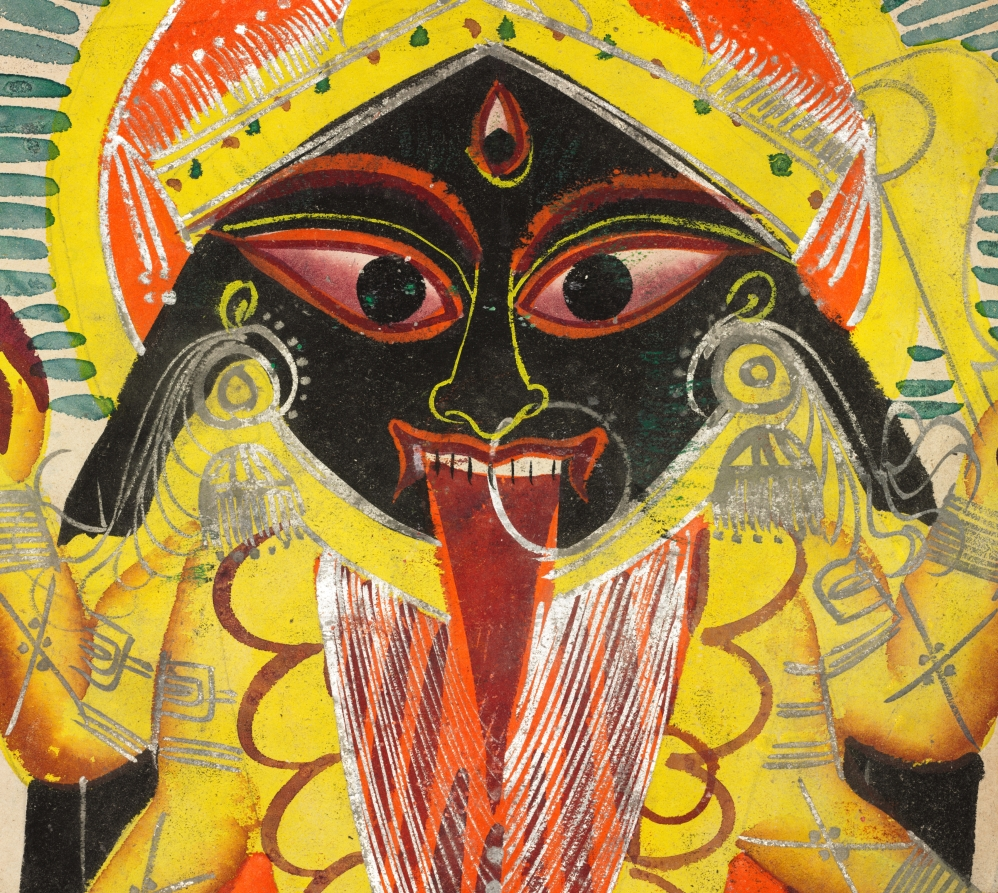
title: The Goddess Kali (recto), from a Kalighat album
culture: Eastern India, Bengal, Kolkata, Kalighat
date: c. 1890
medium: Gum tempera, graphite, ink, and tin on paper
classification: Painting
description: Black-skinned, four-armed, her tongue out, and blood dripping from her mouth, Kali has a third eye—representative of enlightened or divine knowledge—on her forehead. Simultaneously benevolent and dangerous, she holds a sword and a demon’s severed head in two hands while the other two hands are in gestures of protection and blessing. This image would have been sold as a pilgrim souvenir to both locals and the colonial British around the Kalighat temple and is a replica of the image worshipped inside the temple. The frightening image of Kali especially fit into the colonial imagination and into Victorian popular culture and would have been an iconic souvenir/artifact to be shown to intrigued and horrified friends at home in England.